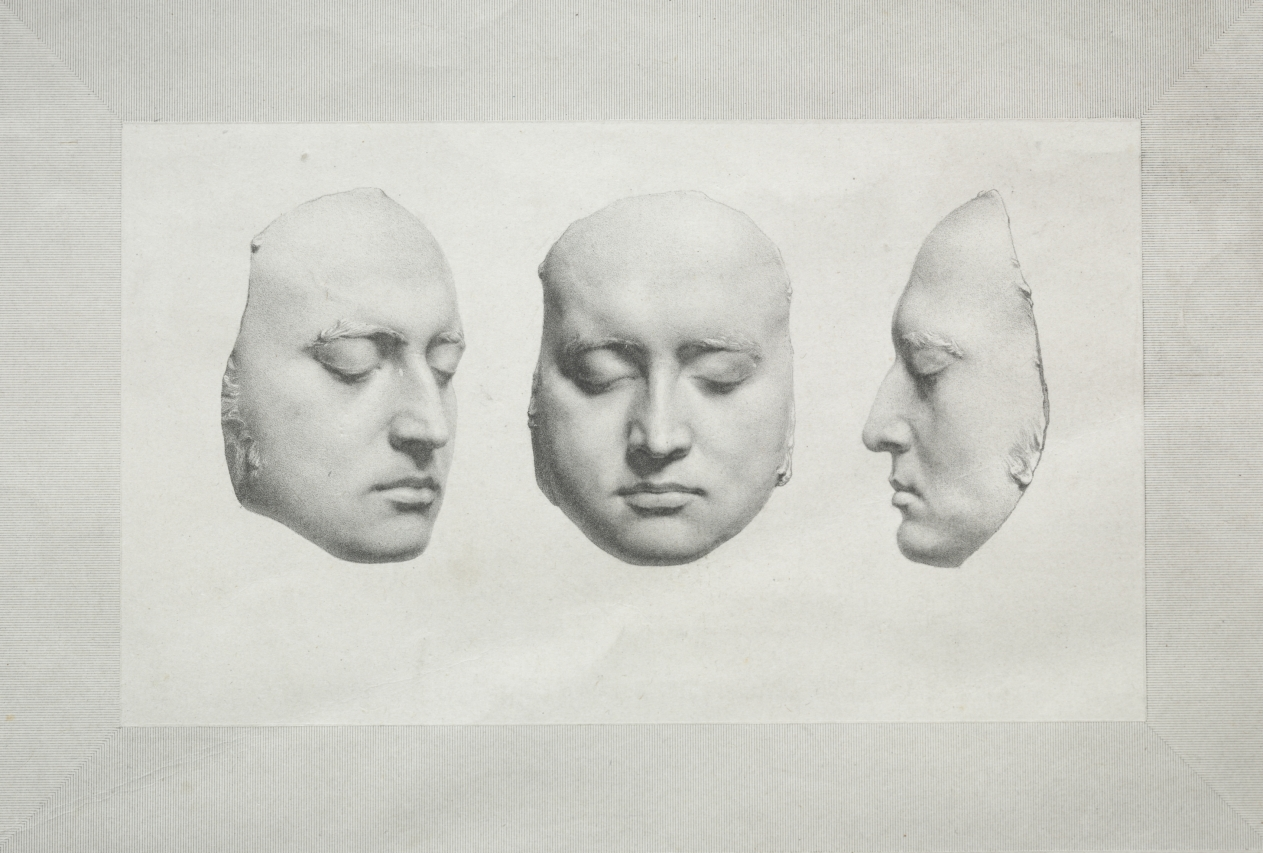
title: Death Mask of Sir Thomas Lawrence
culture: England, 19th century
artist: Richard James Lane (British, 1800–1872)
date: 1830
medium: lithograph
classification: Print